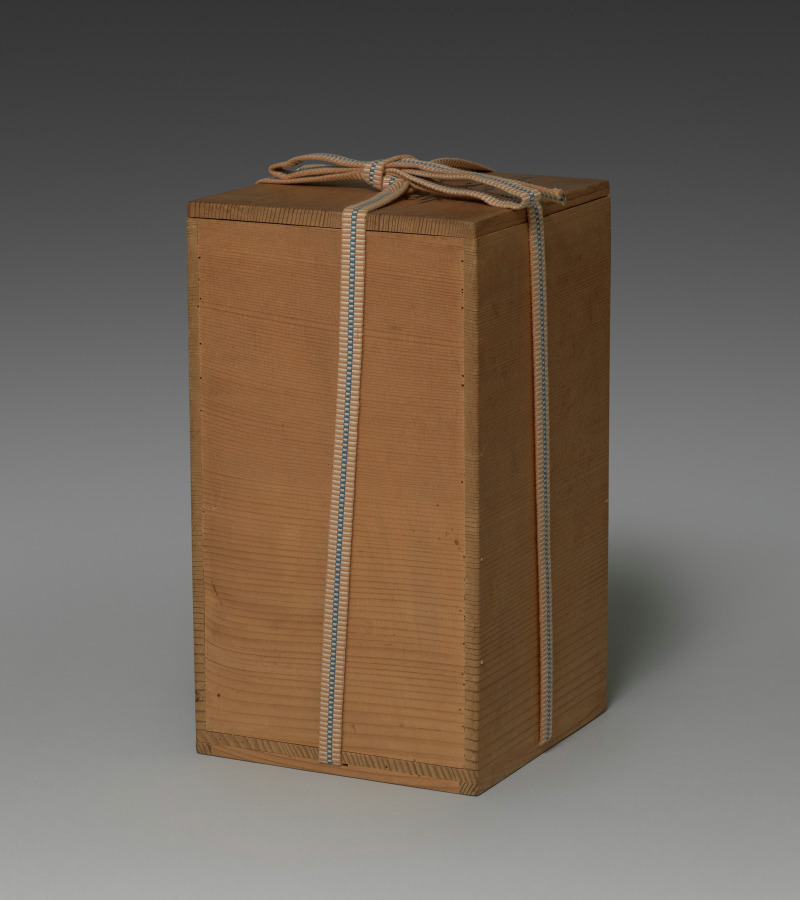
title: Flower Vase with Floral Scroll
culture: Japan, Meiji period (1868–1912)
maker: Seifū Yohei III (Japanese, 1851–1914)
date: 1893–1914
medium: Porcelain with underglaze colors and green glaze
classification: Ceramic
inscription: 清風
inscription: 帝室技芸員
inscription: 金聲玉振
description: The upper part of this vase is painted in underglaze blue with a floral scroll of leaves accentuated with a single chrysanthemum motif on each face and bound at top and bottom with single blue lines. The box lid for the vase is short on detail; the inscription notes only that it is a flower vase with underglaze blue. It is possible that the box is a mismatch because the inscription does not mention the vase’s more distinctive feature: the deep green glaze on its lower half, which is seen much less frequently among Yohei III’s works. This glaze may be an example of a dark green porcelain glaze called rōkanji, which the artist invented in 1892. The name of the glaze comes from Chinese, in which it is pronounced langgan. It may literally mean “tinkling sound of jade” and could refer to malachite, among other proposed identifications.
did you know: The center of each chrysanthemum has a crescent-shaped design at the top filled with a very pale yellow wash under the transparent glaze.